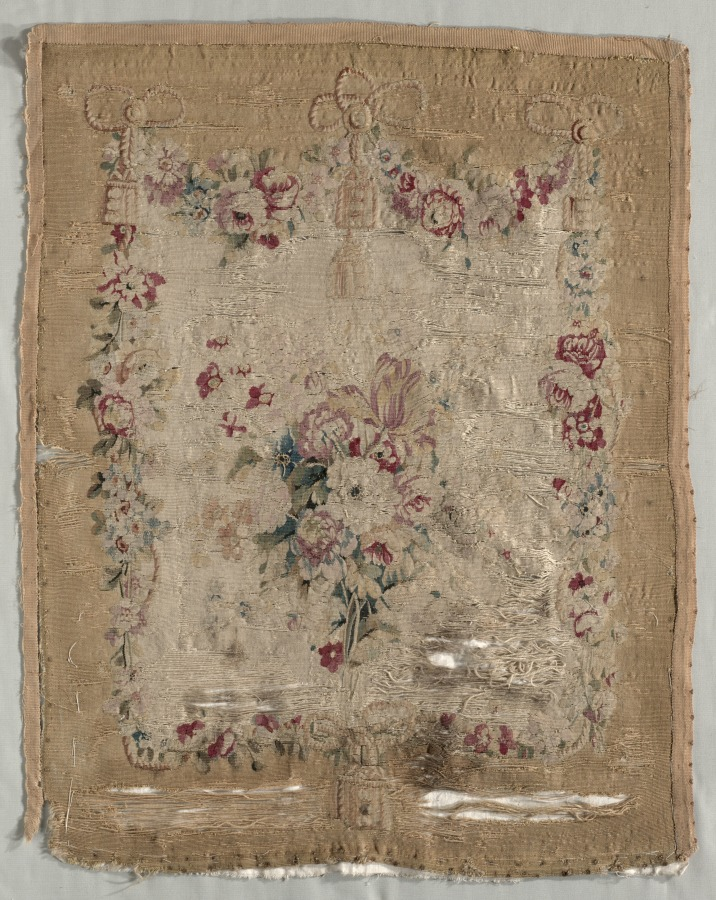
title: Textile Panel for Fire Screen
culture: Unassigned, Unassigned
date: c. 1780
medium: tapestry weave, wool warp (gold and beige), silk weft (polychrome)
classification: Textile